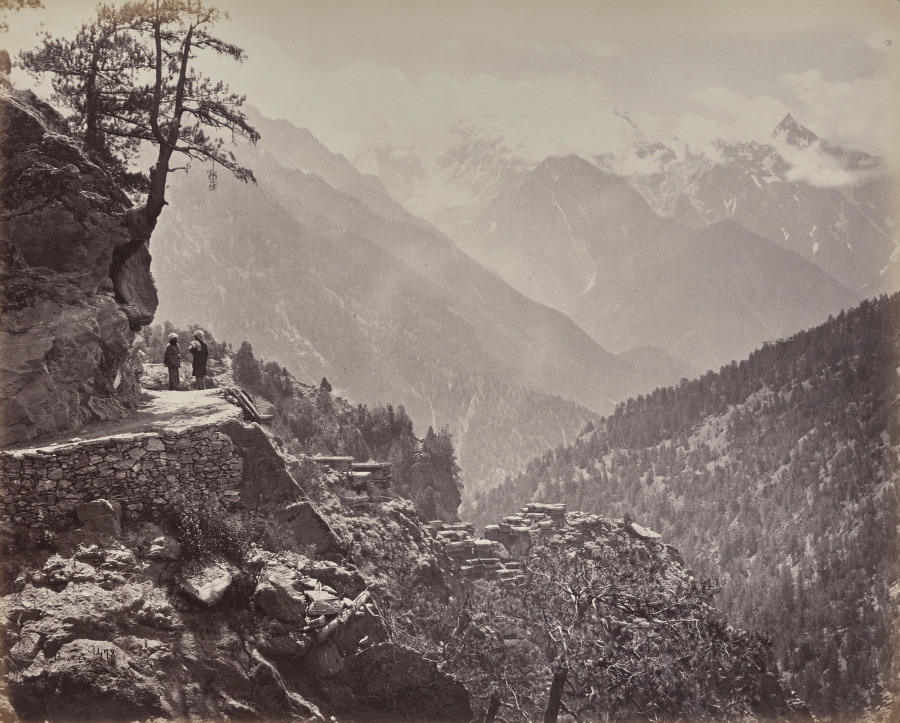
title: The Upper Himmalayahs. View on the New Road between India and China. Mt. Pangi with the Snowy Peaks of China in the Distance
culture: England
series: Photographs of Northern India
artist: Samuel Bourne (British, 1834–1912)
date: 1863–70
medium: albumen print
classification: Photograph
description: The 50 images in this album, all taken in the 1860s, move from the hill towns of the Himalayas down to cities including Lahore (now in Pakistan), Delhi, Lucknow, Agra, Benares (now Varansi), and Calcutta (now Kolkata). Architectural studies of major monuments offer valuable historical records of what sites such as the Taj Mahal and the imperial mosque of the Mughal emperors in Delhi looked like before 20th-century restorations.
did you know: Samuel Bourne, the author of most the images in this album, was a banker in England before he moved to India to become a professional photographer.